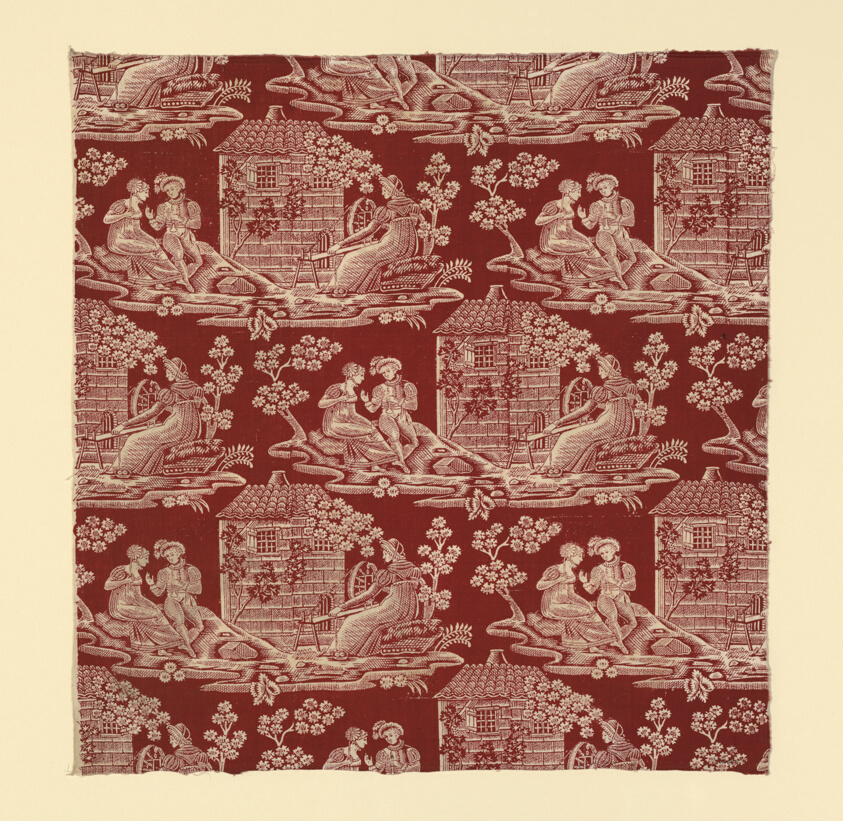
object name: Textile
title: La Trève de Dieu (God's Truce) (Furnishing Fabric)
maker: France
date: c. 1820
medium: Cotton, plain weave; block printed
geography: France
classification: textile; weaving - printed; furnishing textile